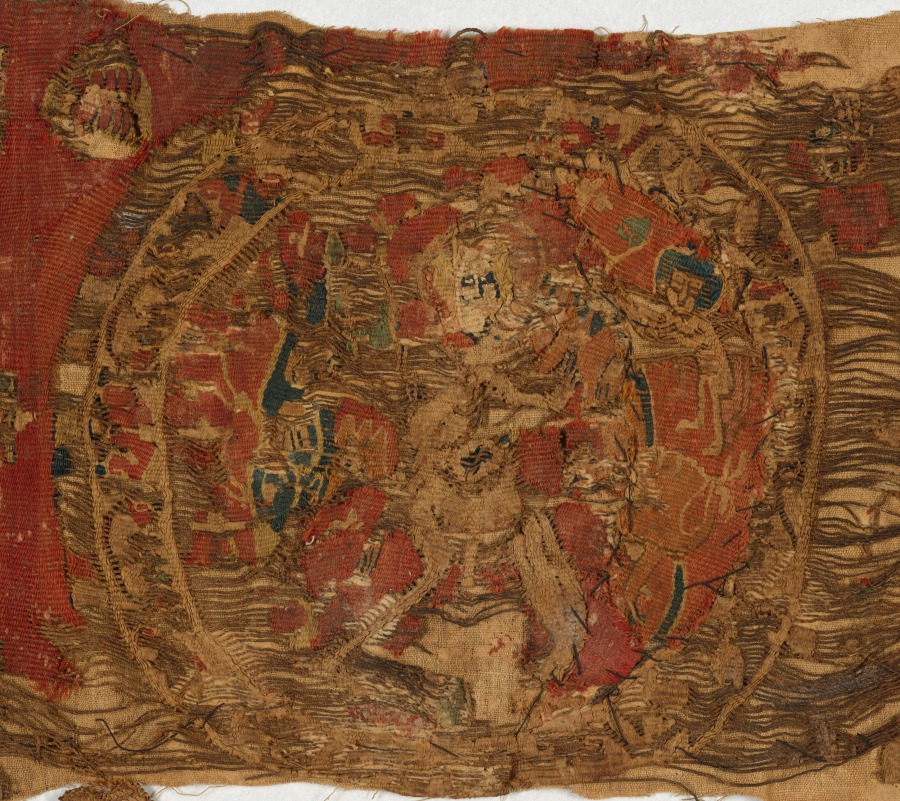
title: Fragment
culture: Egypt, Byzantine period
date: 500s - 600s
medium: tapestry weave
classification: Textile